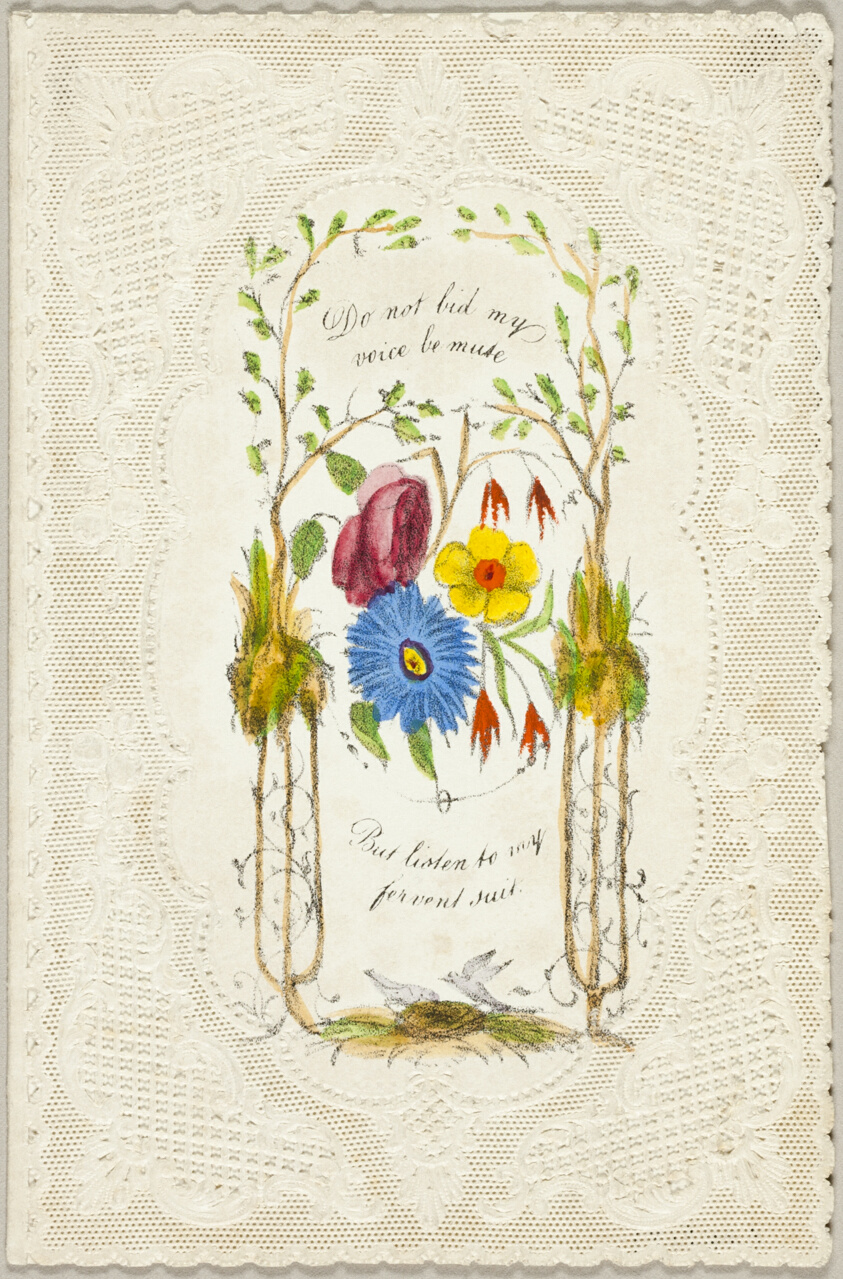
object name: Print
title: Do Not Bid My Voice Be Mute (valentine)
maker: George Meek (English, 19th century)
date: c. 1840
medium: Lithograph with hand-coloring on cut and embossed ivory wove paper (lace)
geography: England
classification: valentine; prints and drawing; print